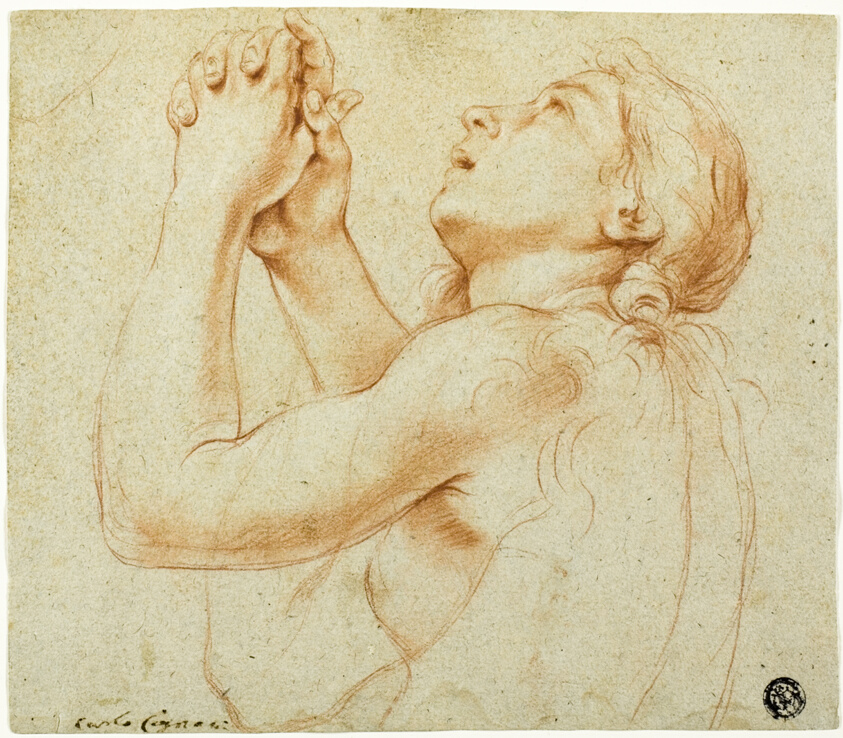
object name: Drawing and Watercolor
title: Praying Magdalene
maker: Carlo Cignani (Italian, 1628-1719)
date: 1670s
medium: Red chalk, with stumping, heightened with touches of white chalk, on pale blue laid paper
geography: Italy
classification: chalk; drawings (visual works); prints and drawing